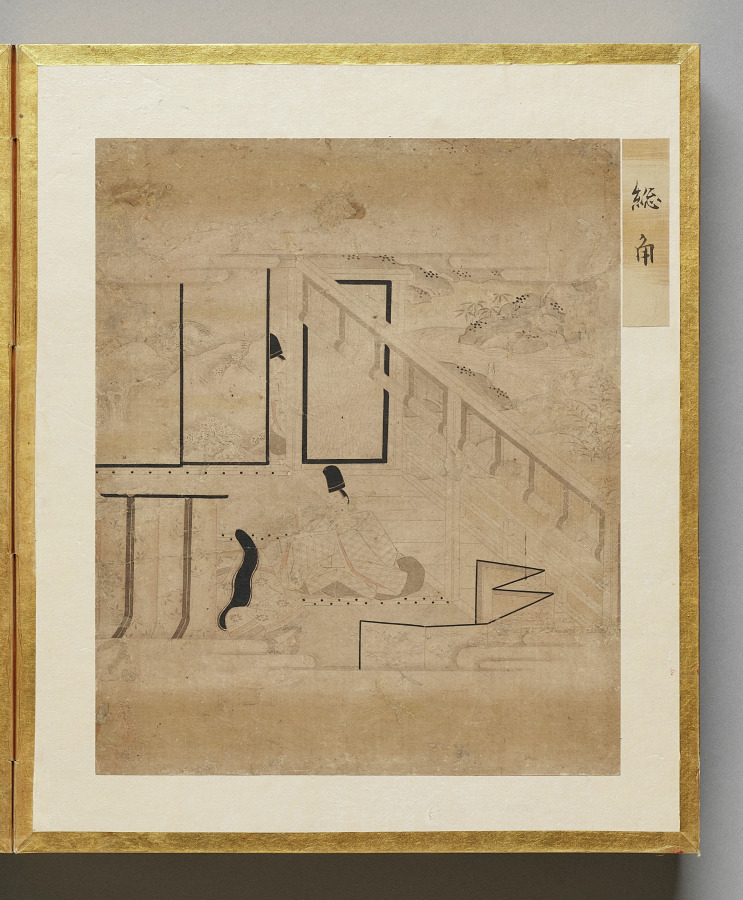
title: Trefoil Knots from Album of Illustrations for the Tale of Genji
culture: Japan, Edo period (1615–1868)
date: 1600s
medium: painting in an accordion-style album; ink, light color, and gold on paper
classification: Bound Volume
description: This album contains illustrations for the classic literary work the Tale of Genji, authored in the 1000s by Murasaki Shikibu, an aristocrat of the Heian period (794–1185) court. The scenes are painted in the “white drawing” (hakubyō) mode, in which a fine ink line is used to depict figures and spaces with great subtlety, punctuated only occasionally by traces of red pigment for a character’s lips, a detail of a garment, or a decorative element. These two scenes illustrate episodes from the chapters “Thin Veil of Cloud” (Usugumo) and “Barrier Gate” (Sekiya).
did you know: The illustrations are identified by chapter title in cartouches to the upper right of the paintings.